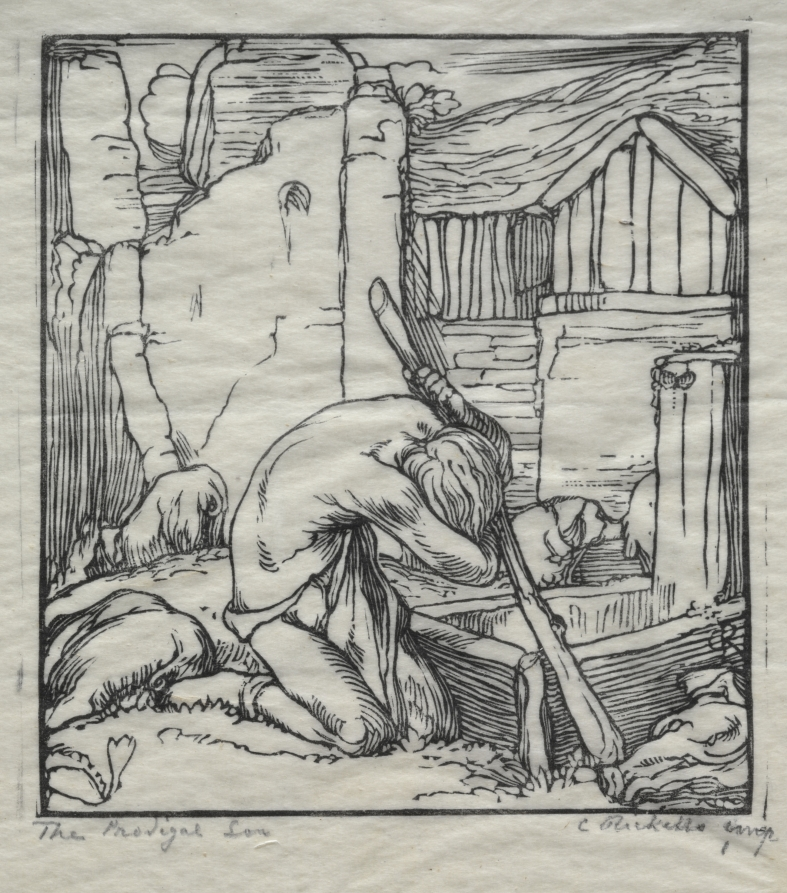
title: The Prodigal Son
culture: England, late 19th-early 20th century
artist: Charles de Sousy Ricketts (British, 1866–1931)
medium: woodcut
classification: Print